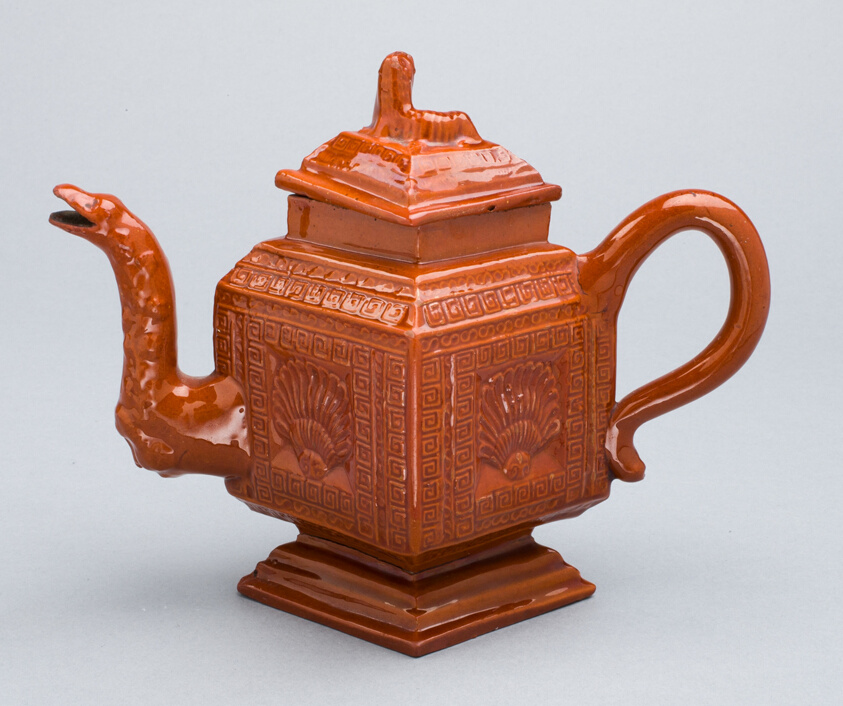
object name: Ceramics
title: Teapot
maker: Staffordshire, England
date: c. 1740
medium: Lead-glazed earthenware (redware)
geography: Staffordshire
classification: teapot; earthenware; lead-glazed earthenware; redware; ceramics; european decorative arts